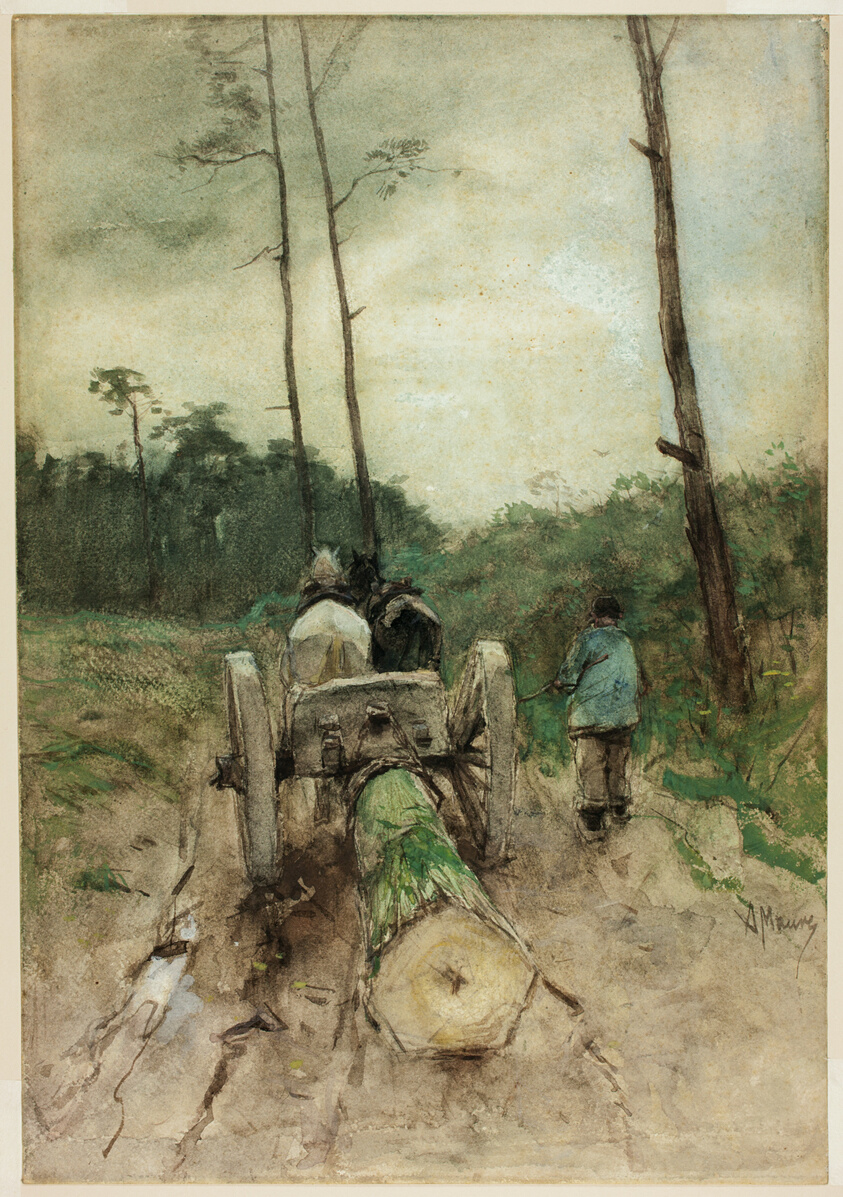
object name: Drawing and Watercolor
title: The Forester's Cart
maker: Anton Mauve (Dutch, 1838-1888)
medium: Watercolor on cream wove paper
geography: Netherlands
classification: watercolor; drawings (visual works); prints and drawing